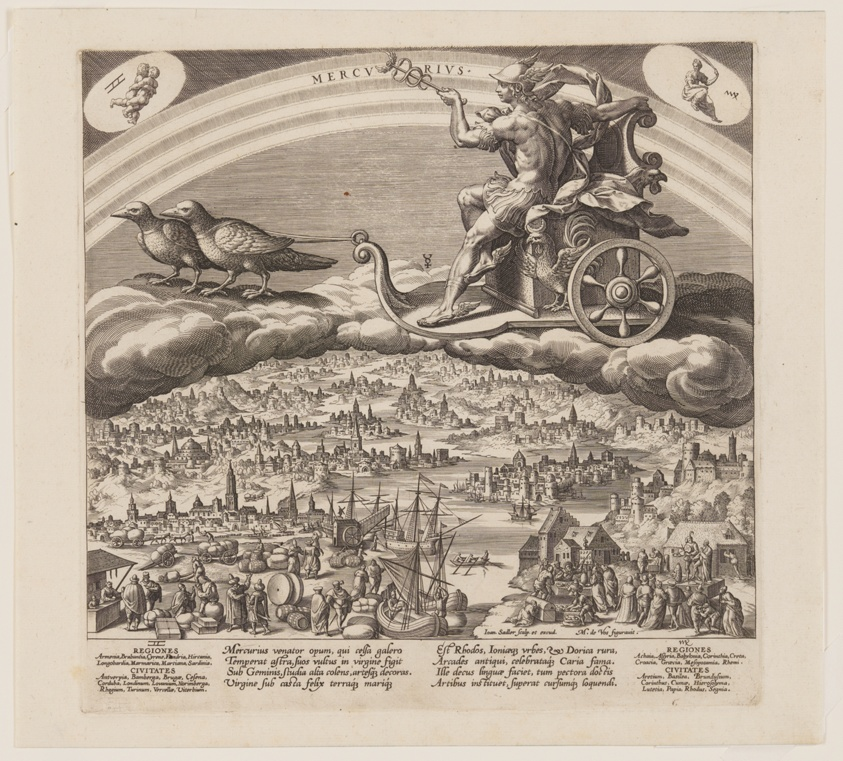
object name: Print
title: Mercurius, from The Seven Planets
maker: Jan Sadeler I (Flemish, 1550–1600); after Maarten de Vos (Flemish, 1532–1603)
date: 1585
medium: Engraving on ivory laid paper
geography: Flanders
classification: engraving; paper; print; prints and drawing